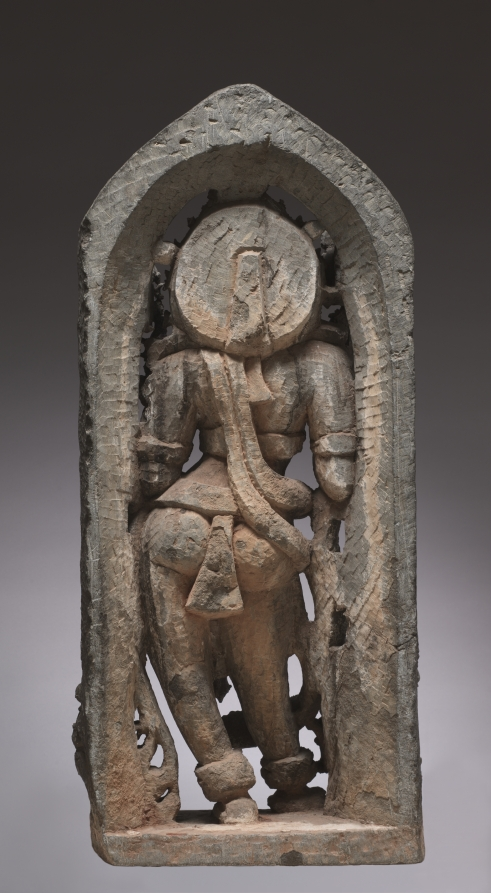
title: A Guardian of Shiva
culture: Southwestern India, Karnataka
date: 1200s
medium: Chloritic schist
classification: Sculpture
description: Guardians at Shiva temples sometimes appear as a form of the deity himself. Carved in the ornate style favored by kings of the Hoyshala dynasty (1026–1343), this four-armed figure holds a drum that indicates the ongoing passage of time in his upper right hand. In his upper left hand, he holds a staff surmounted by a decomposing head of the god of creation, Brahma. The soft contours of the face, complete with third eye of knowledge, temper his ferocity and create a gently alluring figure.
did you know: A three-hooded cobra winds its way up the shaft, while another slithers through the sockets of the skull.